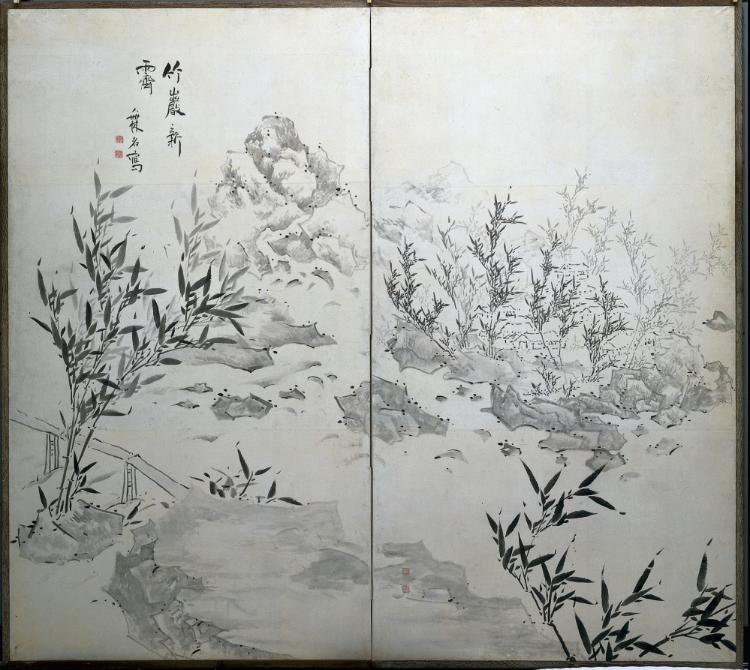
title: Bamboo and Rocks in Clearing Skies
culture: Japan, Edo period (1615–1868)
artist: Ike Taiga (Japanese, 1723–1776)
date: mid-1700s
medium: Two-panel folding screen; ink on paper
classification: Painting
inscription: signed, titled, and sealed by the artist on the top of the left panel. Set of two seals appears once on each panel: after the signature on the left panel and lower left on the right panel. The first of the two square seals reads "ike no mumei," the second reads "sangaku doja."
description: The title written on this screen corresponds to one on a design in Taiga’s Brush Methods (大雅堂画法). The concept conveyed is one of scenery and spirit refreshed by precipitation. In the screen, a rain-filled stream rushes from the mountains into a river. A village is nestled amid giant bamboo in the distance. A platform-like flat rock in the foreground invites us to step into the scene.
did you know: Ike Taiga ranks among the most creative painters of the Edo period: he produced over 1,000 compositions in various formats.